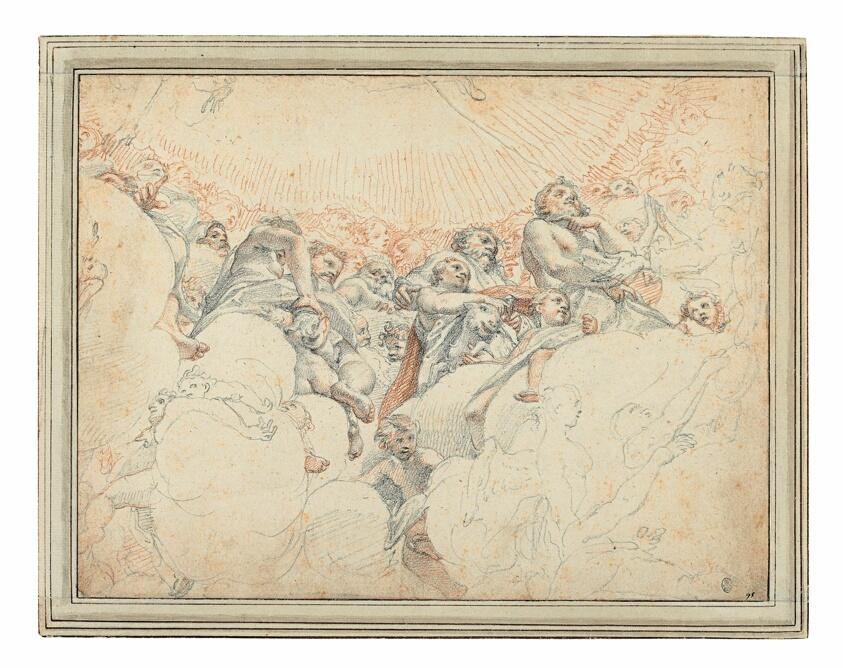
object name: Drawing and Watercolor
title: Assumption of the Virgin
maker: Federico Zuccaro (Italian, 1540/41–1609); after Antonio da Correggio (Italian, c. 1489-1534)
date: 1607/08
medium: Black and red chalk on cream wove paper, laid down on cream laid paper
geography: Italy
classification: drawing; paper; prints and drawing; chalk